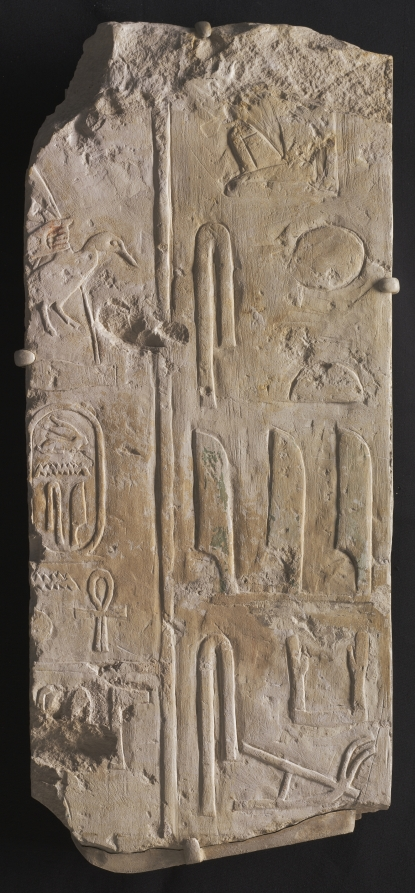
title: Inscribed Relief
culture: Egypt, Saqqara, Old Kingdom (2647–2124 BCE), Dynasty 6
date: c. 2311–2281 BCE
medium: painted limestone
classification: Sculpture